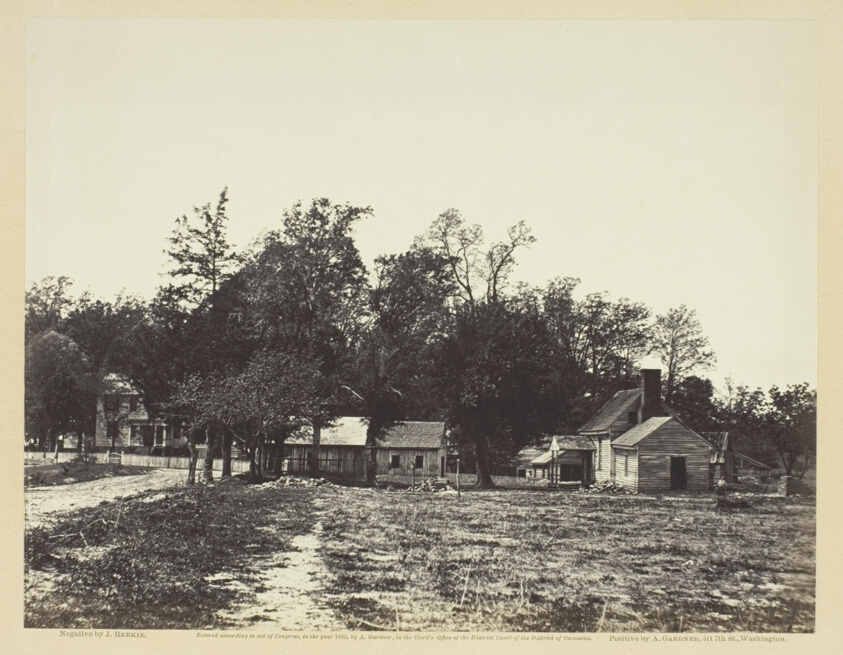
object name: Photograph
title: Mechanicsville, Virginia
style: 19th century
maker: John Reekie (American, active 1861–1865)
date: April 1865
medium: Albumen print, pl. 95 from the album "Gardner's Photographic Sketch Book of the War, Volume II" (1866)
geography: United States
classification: albumen silver print; photographic process; photography; photograph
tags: Collected by Hugh Edwards, Gardner's Photographic Sketch Book